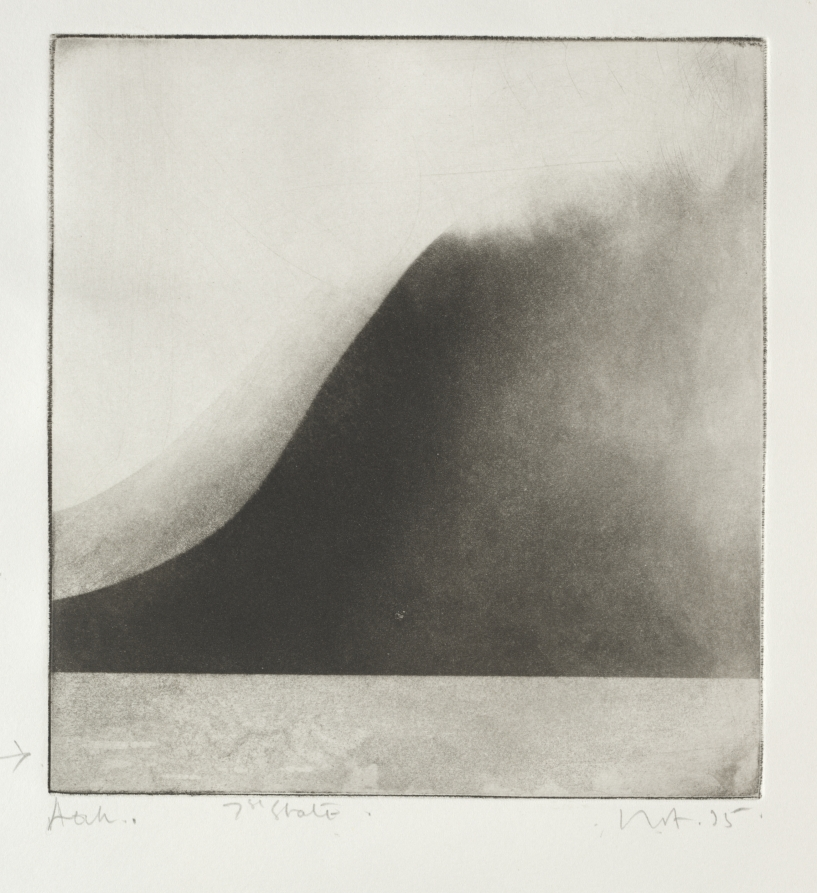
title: Leaf from the Hours of Duke Louis of Savoy: Saints Nereus and Achilleus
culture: France, Savoy(?), 15th century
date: mid-1400s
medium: tempera and gold on vellum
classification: Manuscript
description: Once part of a book of hours made for Louis, Duke of Savoy and Prince of Piedmont (1413–1465), this miniature depicts two Roman martyrs of the early church, Nereus and Achilleus, shown in the center. Their feast day was jointly honored on May 12, suggesting this leaf comes from the Suffrages, a customizable section of a book of hours containing prayers to particular saints. On the left we see the saints being asked to worship idols, which they refuse. They are then burned at the stake and beheaded. On the right we see their burial at the top and the transfer of their relics to a new location below. Some sections this book are currently preserved in the Bibliothèque Nationale in Paris.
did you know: An estimated 82 folios is still missing from the original manuscript, the bulk of which is preserved in Paris.